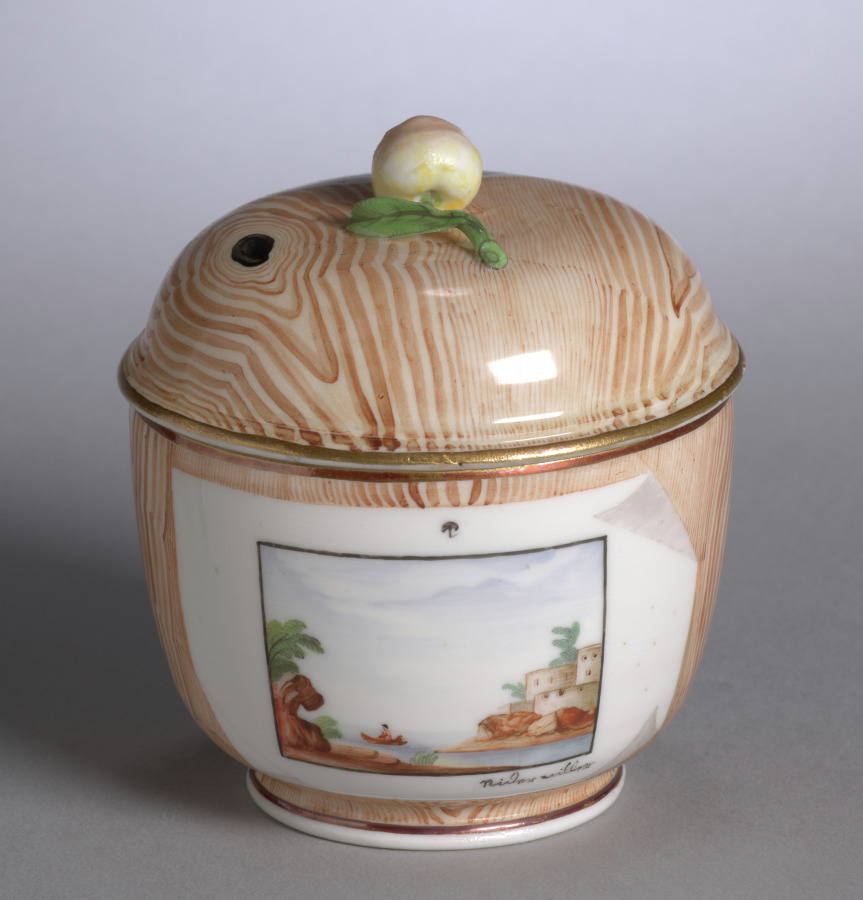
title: Covered Bowl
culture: France, 18th century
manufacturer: Niderviller Factory (French)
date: c. 1775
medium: Hard-paste porcelain with enamel and gilt decoration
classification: Ceramic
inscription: [Inscribed at lower right corner of two trompe l'oeil prints]: "Niderville"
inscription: [Interlaced 'CC', in black]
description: This covered bowl is decorated with pieces of paper painted in trompe l’oeil, an effect that gives two-dimensional surfaces the illusion of extending into three-dimensional space, on a faux bois, or fake wood, background. This unique style of decoration was likely invented at Niderviller, but taken up by other European porcelain factories including those at Locré, Vienna, and Tournai.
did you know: Established in 1749, the Niderviller porcelain factory remained in operation following the 1789 French Revolution, though its owner, Adame Philippe, count of Custine, was executed in August of 1793.